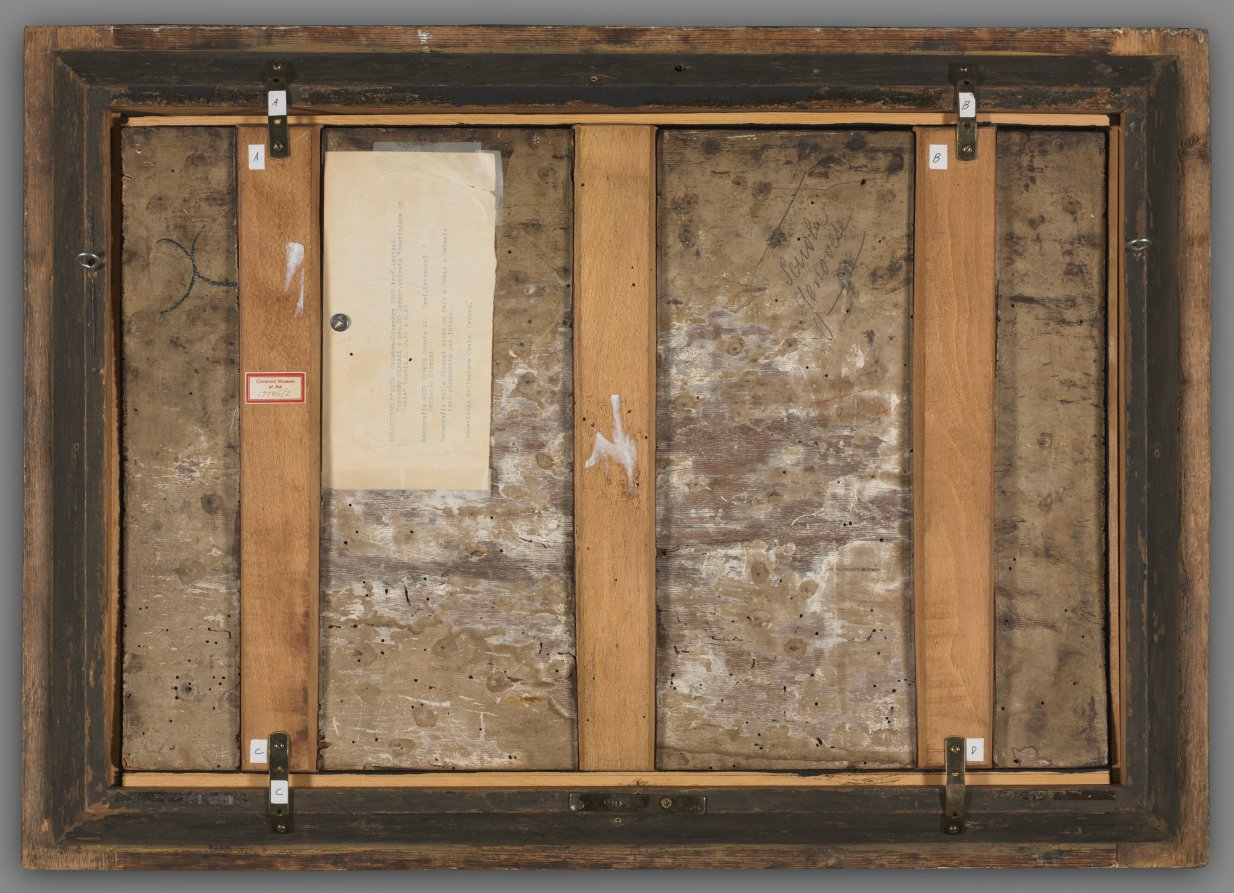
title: The Healing of Tobit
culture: Italy, 17th century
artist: Bernardo Strozzi (Italian, 1581?-1644)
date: c. 1625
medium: oil on wood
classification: Painting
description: This scene is the moving conclusion of the story of Tobias, the young man at the right. It addresses the themes of family devotion and trust. Tobias’s father sent him on a long journey to retrieve family money. The angel Raphael appeared as a relative, offering the traveler protection against such things as an attack by a huge fish, whose organs Tobias took on Raphael’s advice. Upon his return home, Tobias discovers his father has gone blind, and Raphael advises him to place the fish’s gallbladder on his father’s eyes to cure him. Strozzi depicts the miraculous cure and the moment in which Raphael reveals that he is an angel.